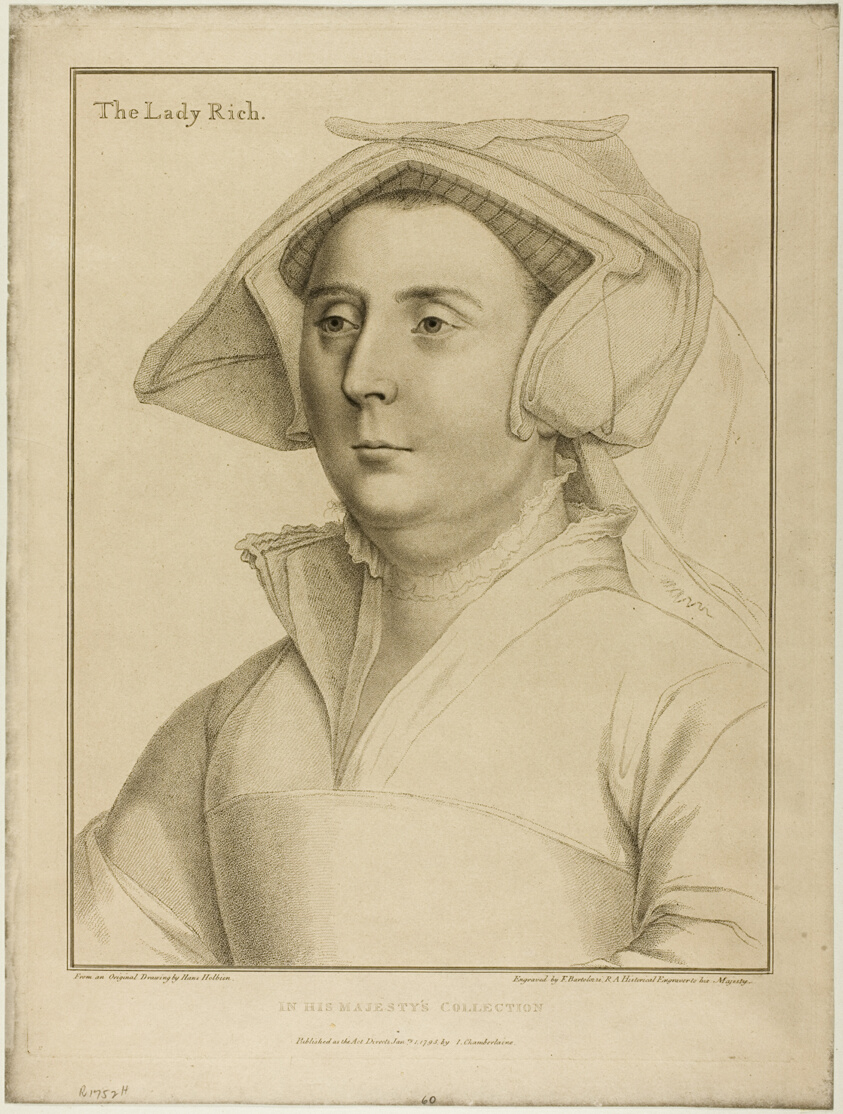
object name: Print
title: Lady Rich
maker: Francesco Bartolozzi (Italian, 1727-1815); after Hans Holbein the younger (German, 1497-1543)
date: January 1, 1795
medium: Stipple engraving on buff wove paper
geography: Italy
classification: engraving; print; prints and drawing